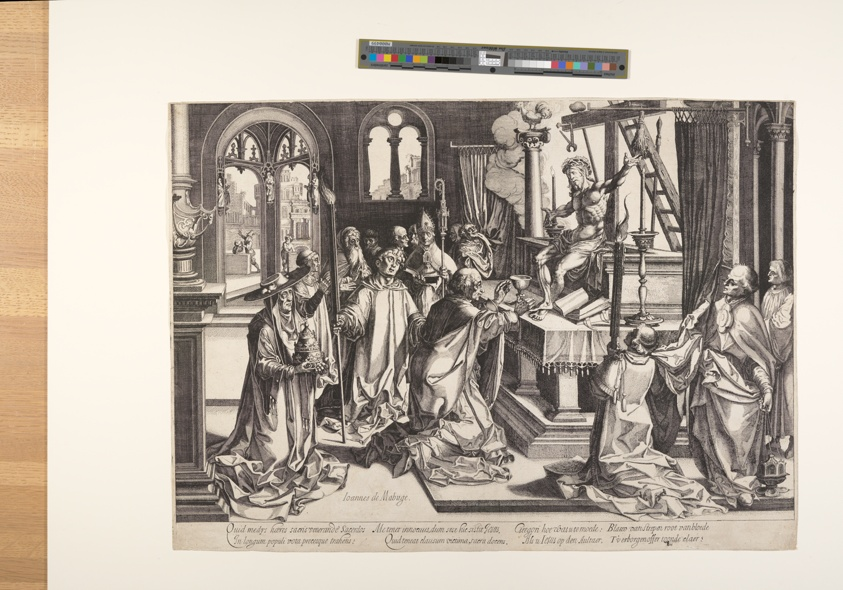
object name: Print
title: The Mass of Saint Gregory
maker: Simon Frisius (Dutch, c. 1580–1629); after Jan Gossaert (Flemish, 1478–1532)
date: c. 1615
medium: Etching on ivory laid paper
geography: Netherlands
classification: print; paper; prints and drawing; etching